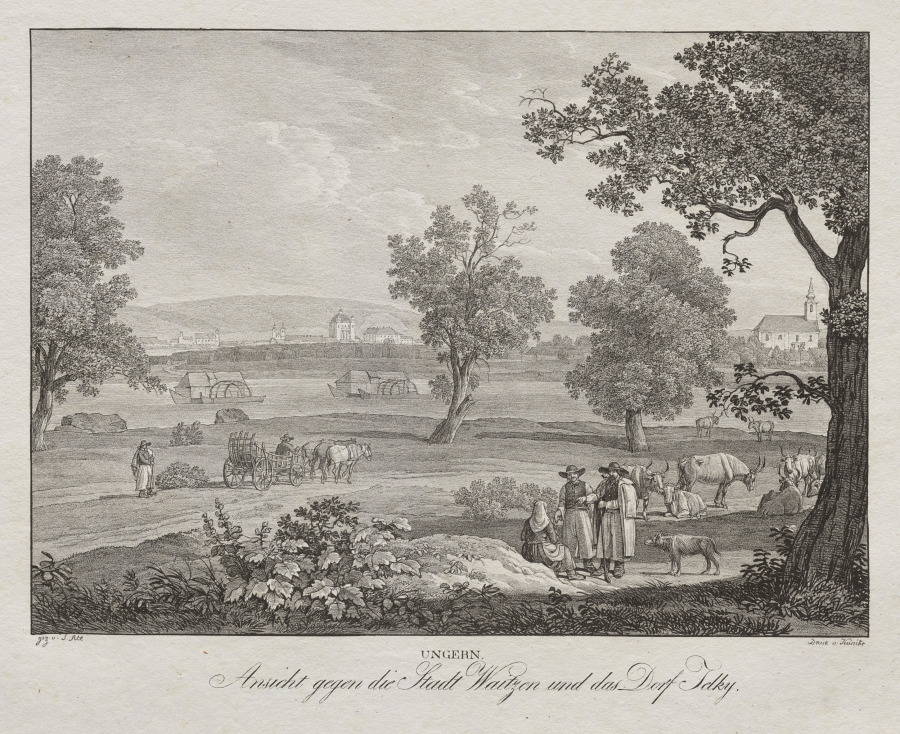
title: Ungern, Ansicht gegen die Stadt Waitzen und das Dorf Telky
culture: Austria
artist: Jakob Alt (Austrian, 1789–1872)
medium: lithograph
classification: Print